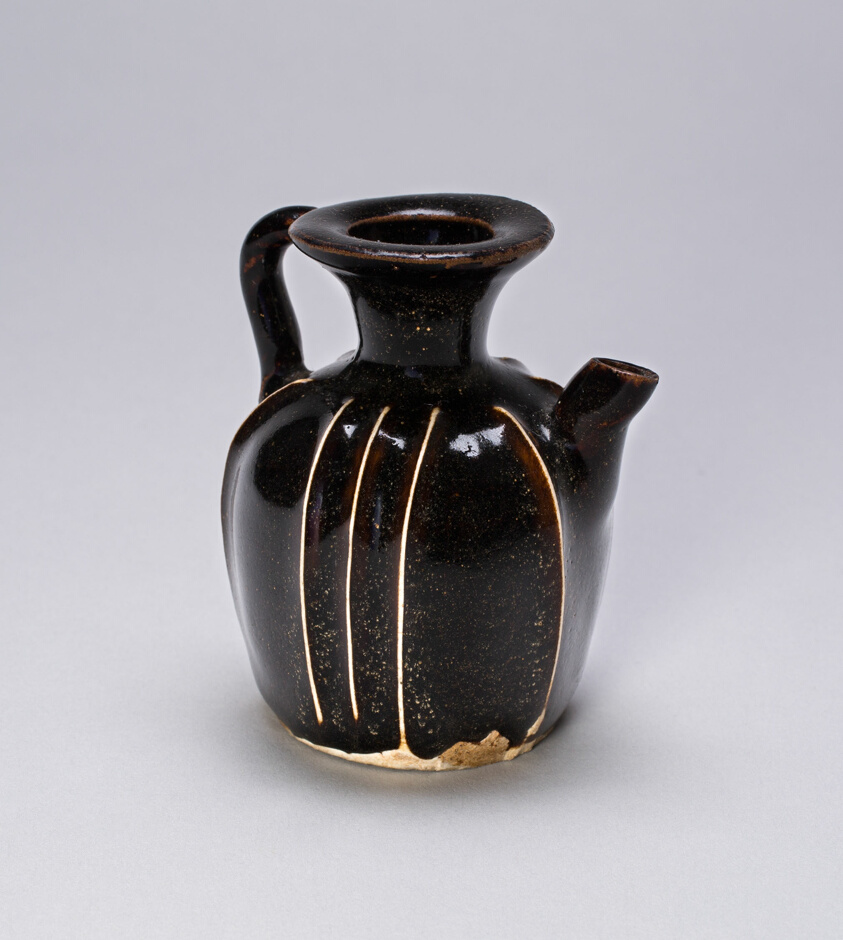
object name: Vessel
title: Handled Ewer with Vertical Ribs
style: Chinese (culture or style)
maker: China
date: Northern Song dynasty (960–1127) or Jin dynasty (1115–1234), 12th/13th century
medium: Northern blackware, Cizhou type; light grey stoneware with white trailed slip under dark brown glaze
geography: China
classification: ewer (vessel); vessel; ceramics